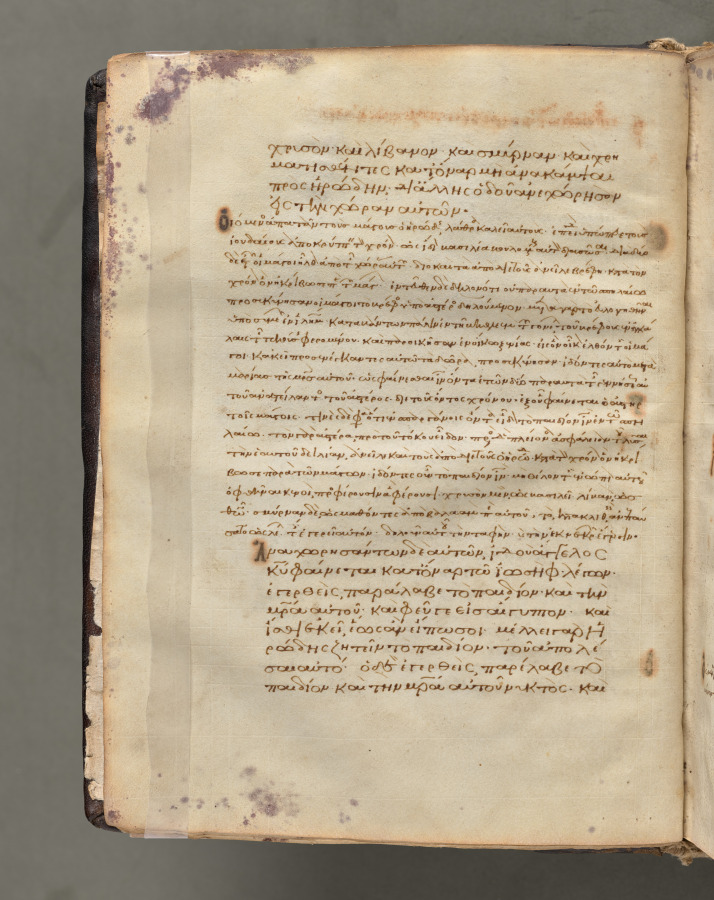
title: Text, folio 10 (verso), from a Gospel Book with Commentaries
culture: Byzantium, Constantinople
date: c. 1000–1100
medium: ink, tempera, and gold on vellum; leather binding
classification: Bound Volume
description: Each of the four gospels in this book opens on a page with brilliantly illuminated borders depicting the author of the text as well as birds-principally peacocks, symbols of the immortality of the soul-and fountains, representing the fountain of life and the salvation of the soul. This volume consists of 428 leaves with texts in Greek. Its level of sophistication suggests that it was probably written and decorated in a monastery in Constantinople.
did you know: Gospel Books were carried in procession through Byzantine churches.